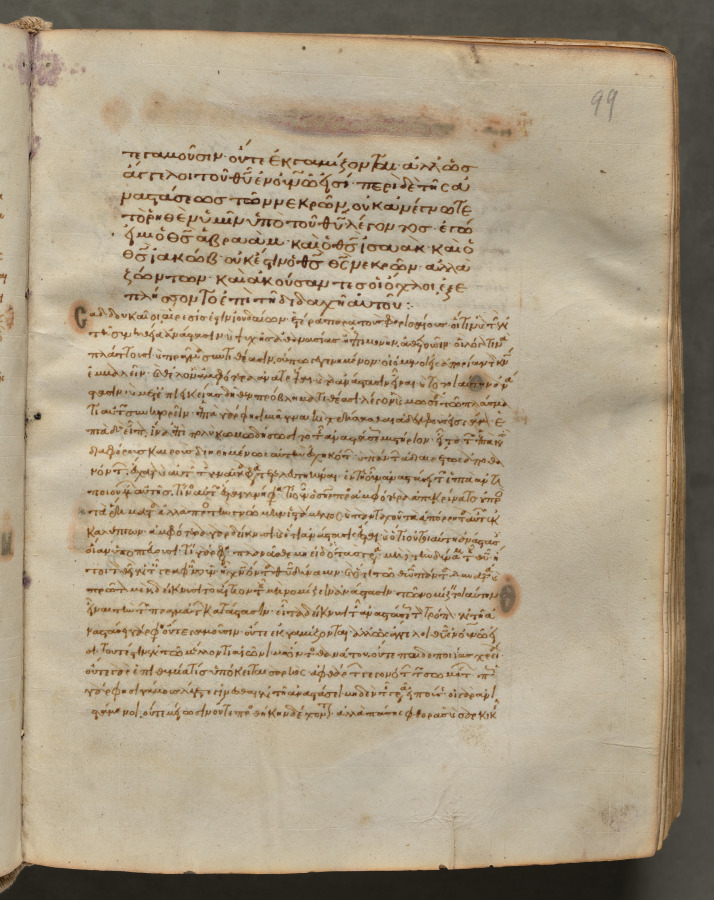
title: Text, folio 99 (recto), from a Gospel Book with Commentaries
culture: Byzantium, Constantinople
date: c. 1000–1100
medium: ink, tempera, and gold on vellum; leather binding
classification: Bound Volume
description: Each of the four gospels in this book opens on a page with brilliantly illuminated borders depicting the author of the text as well as birds-principally peacocks, symbols of the immortality of the soul-and fountains, representing the fountain of life and the salvation of the soul. This volume consists of 428 leaves with texts in Greek. Its level of sophistication suggests that it was probably written and decorated in a monastery in Constantinople.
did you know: Gospel Books were carried in procession through Byzantine churches.